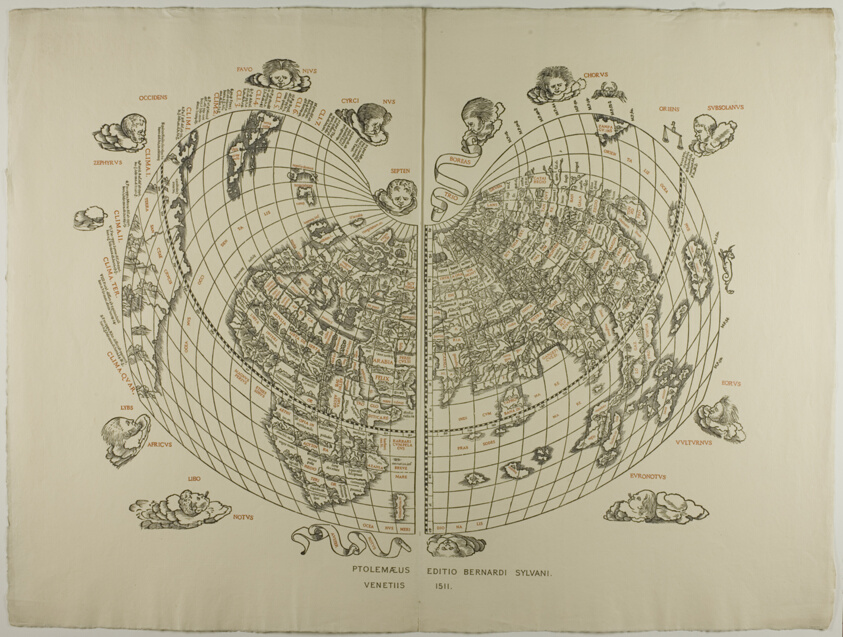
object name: Print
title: Map of the World: Tradewinds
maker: Unknown Artist (English, 19th century); published by Bernardi Sylvani (Italian, active 1511)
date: 1511, reprinted 1889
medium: Woodcut in black on cream laid paper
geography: England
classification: reproduction; print; prints and drawing